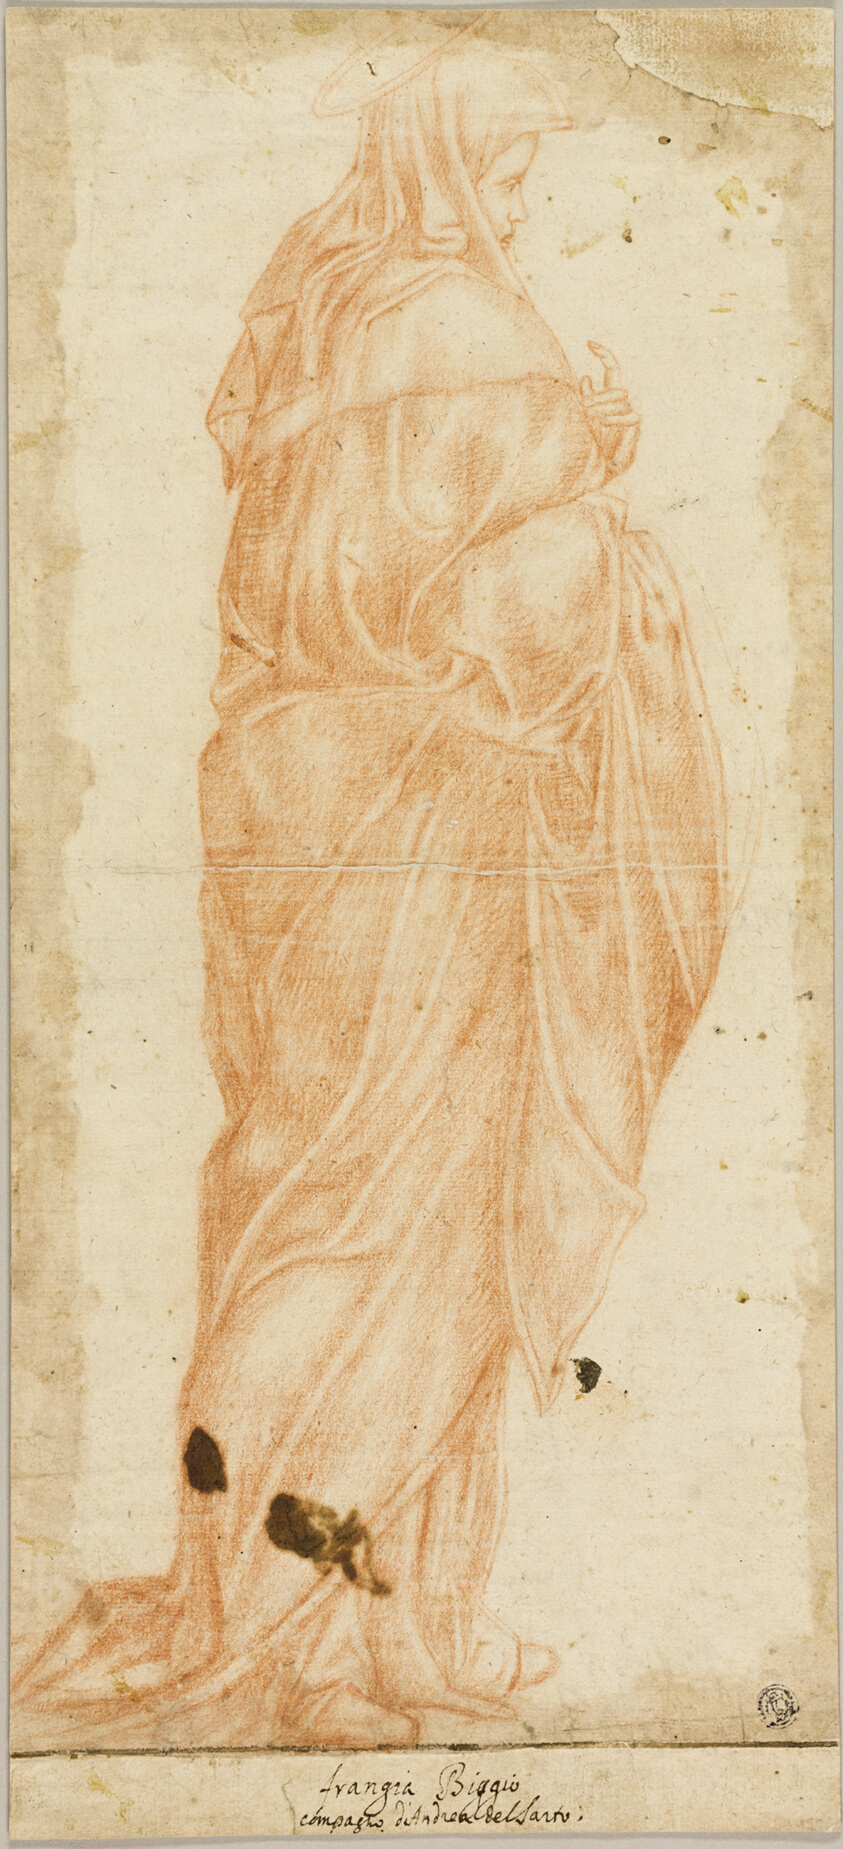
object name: Drawing and Watercolor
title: Virgin Mary Standing in Profile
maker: After Francesco di Cristofano, called Franciabigio; Italian, 1484-1525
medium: Red chalk on cream laid paper, laid down on ivory laid paper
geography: Italy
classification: chalk; drawings (visual works); prints and drawing